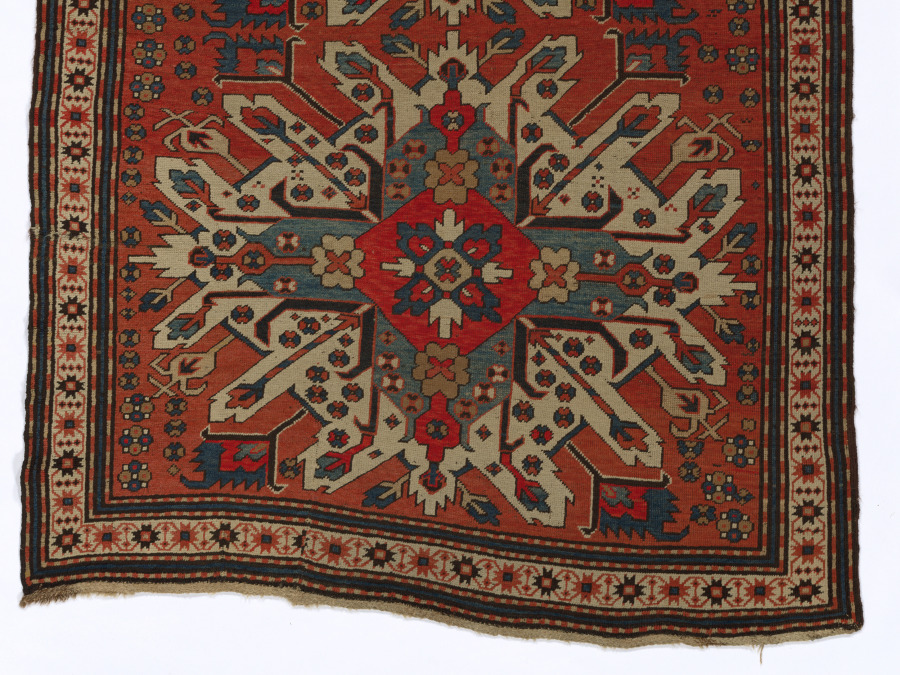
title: Carpet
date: 1800–1850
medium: Undyed wool: ground warp; dark brown wool: ground weft; dyed wool (polychrome): Ghiordes knotted pile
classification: Carpet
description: Nomadic groups, who moved across the grasslands and steppes between the Caucasus regions near the Caspian Sea to Central Asia and China, perfected the making of textiles, carpets, and other movable works of art. Carpets were woven from sheep’s wool to be strong and thick, and served as protection from the elements. This example is decorated with a double geometric sunburst motif.